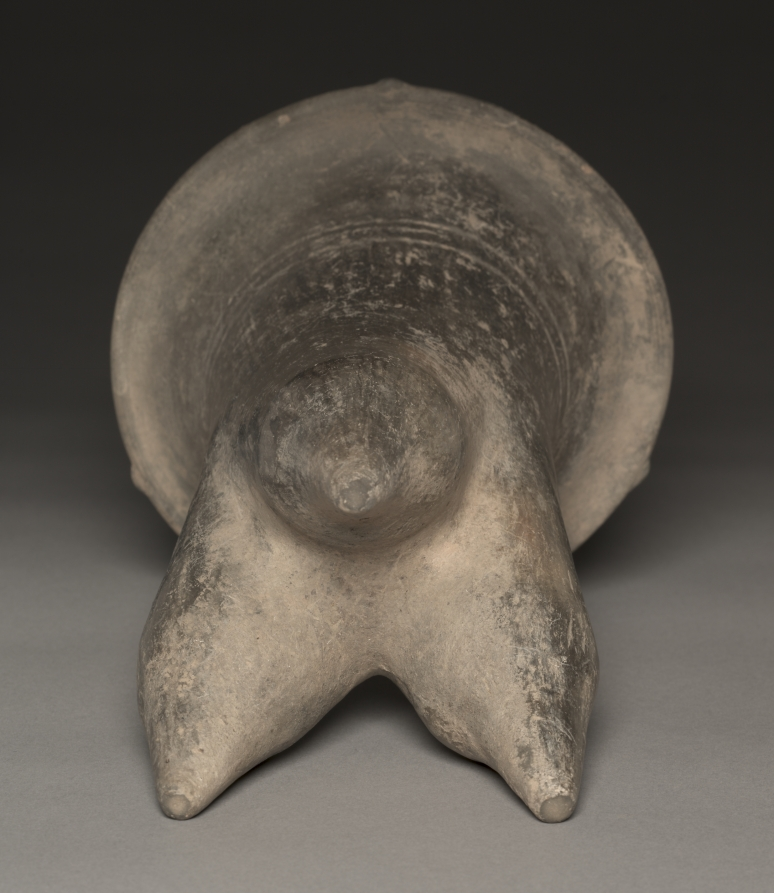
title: Li, Hollow-Legged Tripod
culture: China, Inner Mongolia, lower stratum of the Xiajiadian culture (2200–1600 BCE)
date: 1200–800 BCE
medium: dark gray earthenware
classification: Ceramic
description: This pottery li tripod—which was originally used as a cooking vessel—belongs to the lower stratum of the Xiajiadian culture that flourished in northeast China. Comparable examples with similar shape and proportion have been excavated in Inner Mongolia. A ceramic shape invented and borrowed from central China, li tripod appeared at a later date in the northeast, with limited examples from the late Neolithic period. As an artifact representative of the lower Xiajiadian culture—which was contemporary with the Shang dynasty in central China where bronze production had already been highly developed—pottery li tripod was popular in the northeast during the Bronze Age and was widely spread from the Liaodong to the Liaoxi regions, including Inner Mongolia.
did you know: This vessel not only reveals an interesting relationship between ceramic and bronze shapes but also the cultural impact of central China on the border regions.